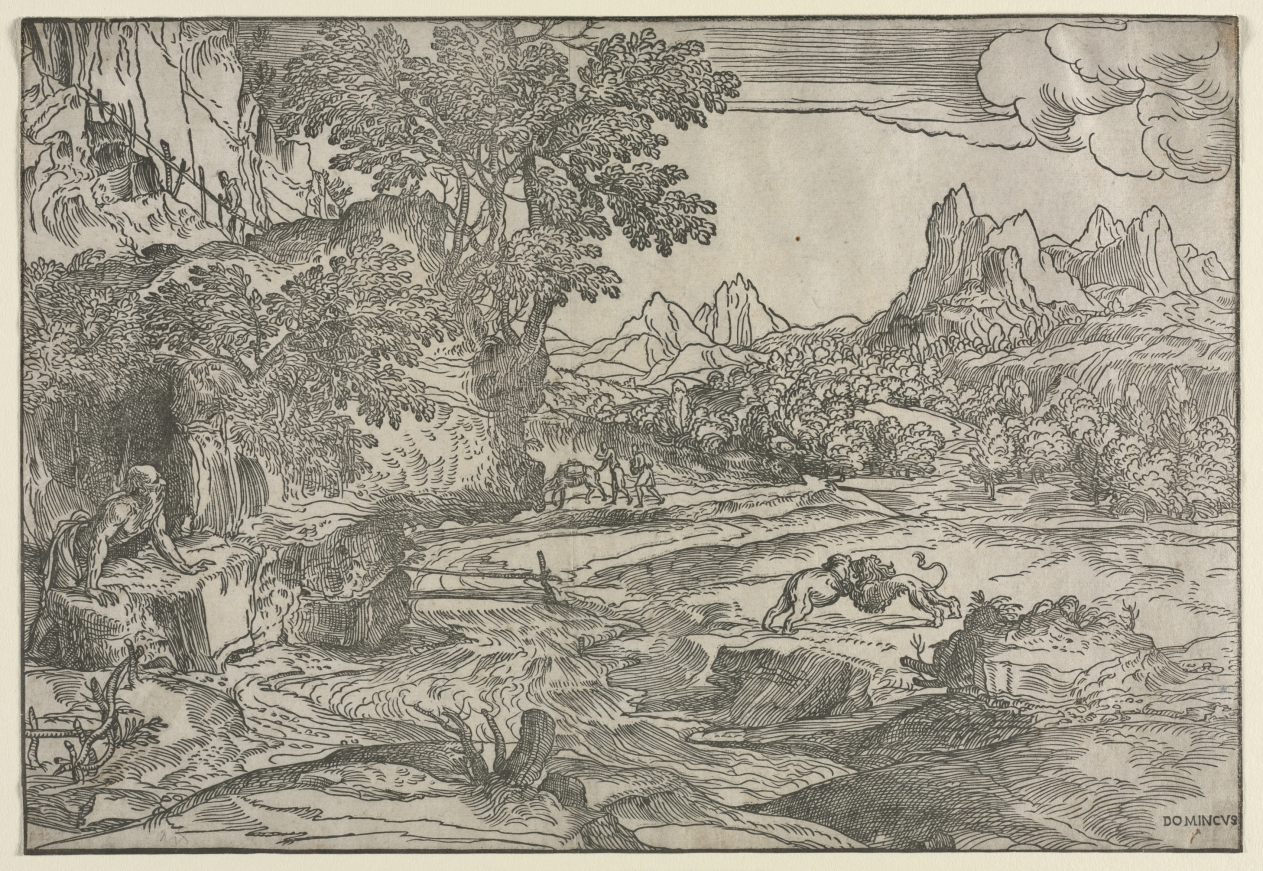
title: Landscape with Saint Jerome and Two Lions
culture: Italy, 16th century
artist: Domenico Campagnola (Italian, 1500–1564)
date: c. 1530–35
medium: woodcut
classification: Print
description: Domenico Campagnola made woodcuts primarily to mimic his drawings for a growing collector’s market. In this image of Saint Jerome, who retreated to the wilderness as an act of penitence, Campagnola focused not on the saint’s devotion to the cross, nor to the Bible, but rather on his contemplation of nature. Domenico’s portrayal of nature has pastoral elements, such as travelers or shepherds, and emphasizes variety, including a stream, mountain peaks, a cave, clusters of trees, and a playful conflict between two lions.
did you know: Domenico Campagnola's woodcuts such as this were made with the purpose of imitating his own pen and ink drawings.